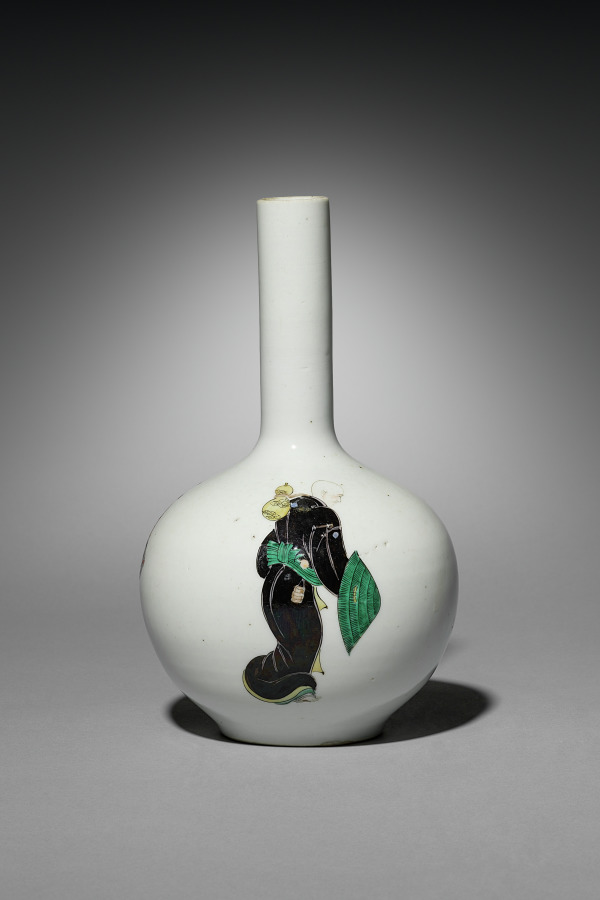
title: Sake Bottle with Three Figures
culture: Japan, Edo period (1615–1868)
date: late 1700s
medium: porcelain with overglaze enamel and gold decoration (Hizen ware, Arita type)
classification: Ceramic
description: The bottle features three elegantly drawn figures: a beautiful woman, a young man, and a priest. The artist used a fine-haired brush to draw these figures in colored enamel onto the porcelain bottle, which had already been given a clear glaze. A final firing fused the enamel to the form. The name derives from the port of Imari from where Japanese porcelains were shipped to other cities in Japan, China, and Europe.